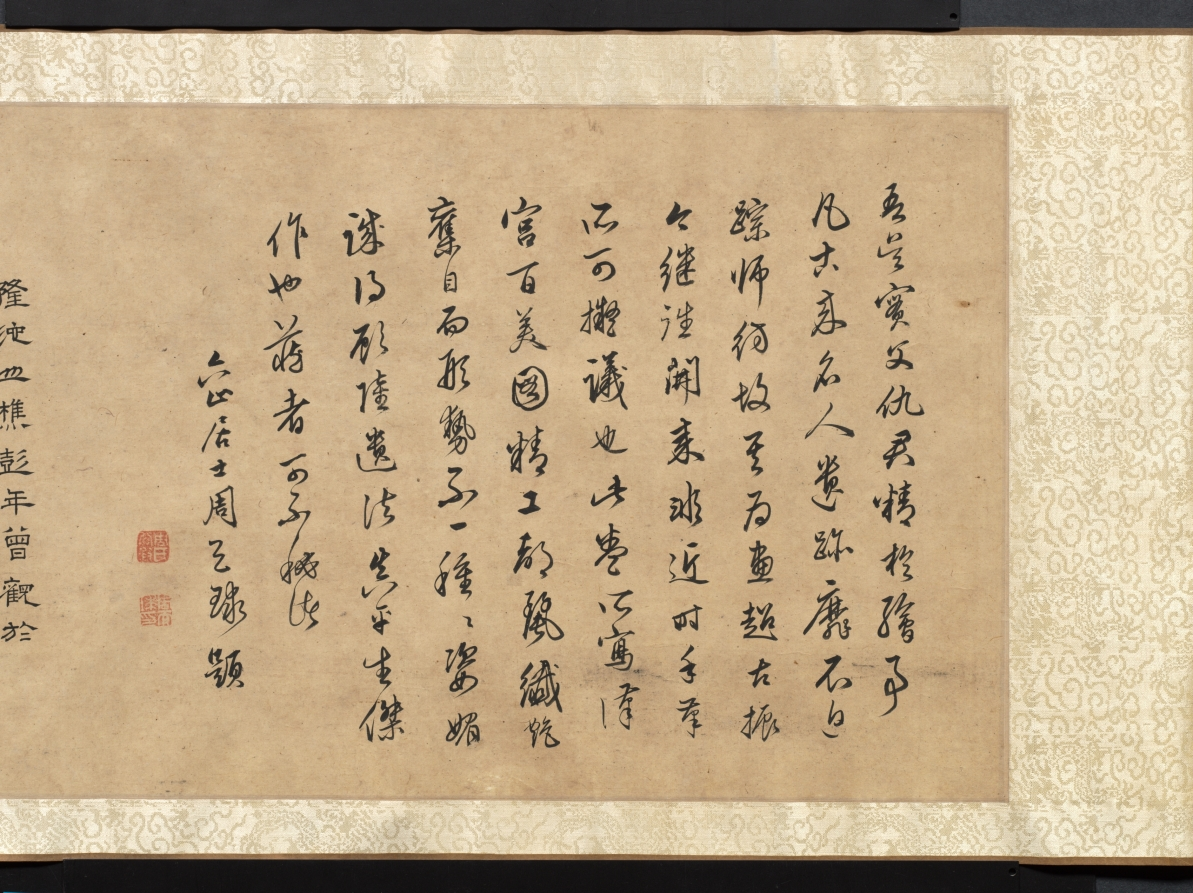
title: Palace Ladies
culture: China, Qing dynasty (1644-1911)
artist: copy after Qiu Ying (Chinese, 1494–1552)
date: 1644–1911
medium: handscroll, ink and color on silk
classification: Painting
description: This handscroll illustrates the pursuits of court ladies in a palace precinct on a spring day. Women, young girls, and their maids amuse themselves by sitting on a swing, playing games, watering and admiring peonies, performing music together, playing the qin (zither), feeding a parrot on the balustrade and fish in the water, or catching butterflies. The life of elite women was mostly restricted to the so-called inner quarters, meaning the garden and inner courts of the house. This painting idealizes the world of young palace girls that in fact was often filled with boredom and waiting for a lover.